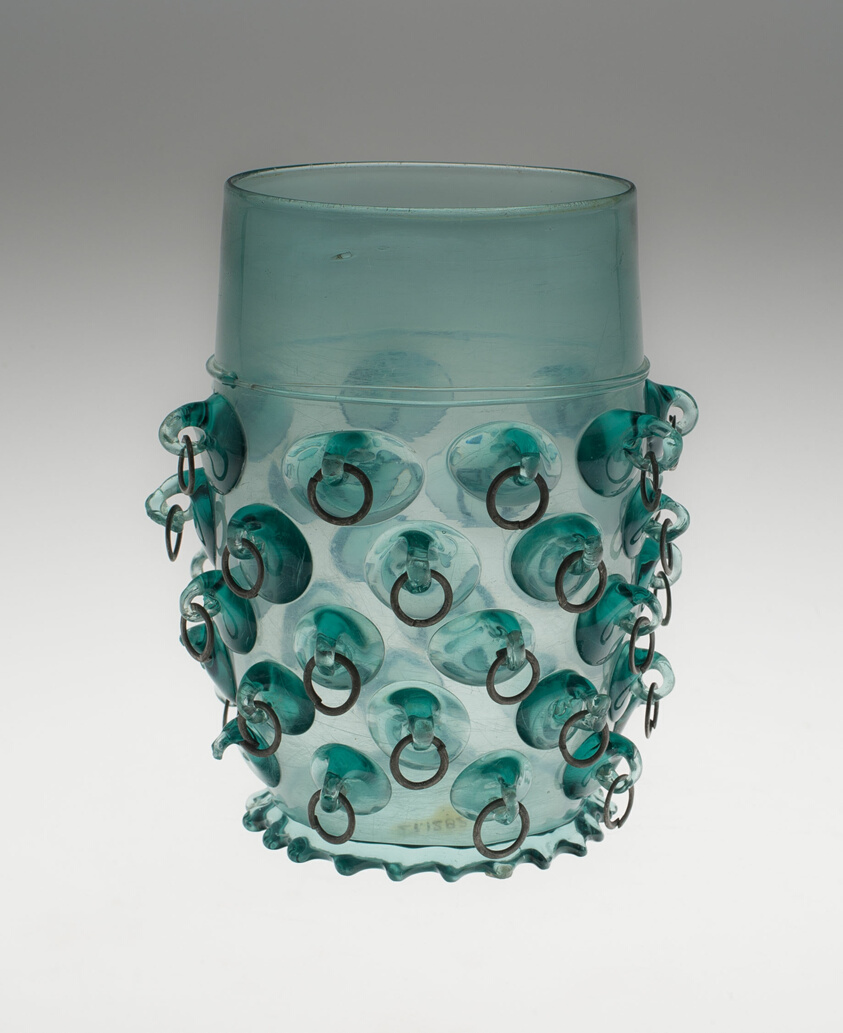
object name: Glass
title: Beaker with Prunts and Metal Rings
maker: German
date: 1600/25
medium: Green glass, base metal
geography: Germany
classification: drinking vessel; glass; european decorative arts